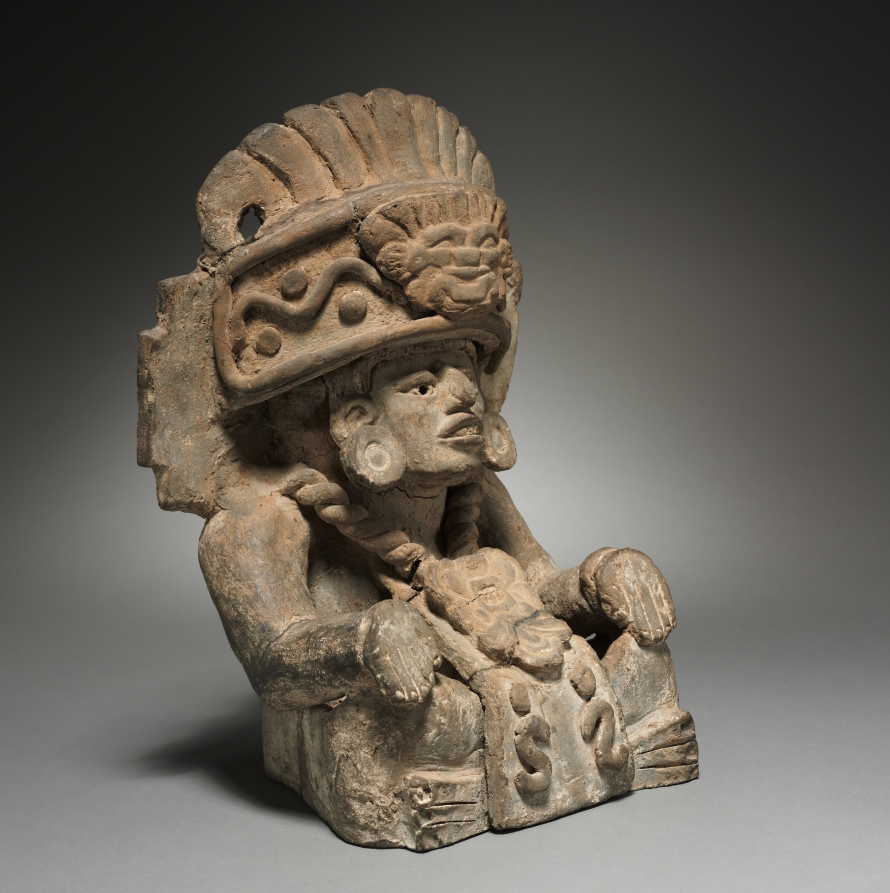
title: Funerary Urn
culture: Mexico, Oaxaca, 5th-6th Century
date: 400s-500s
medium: earthenware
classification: Sculpture